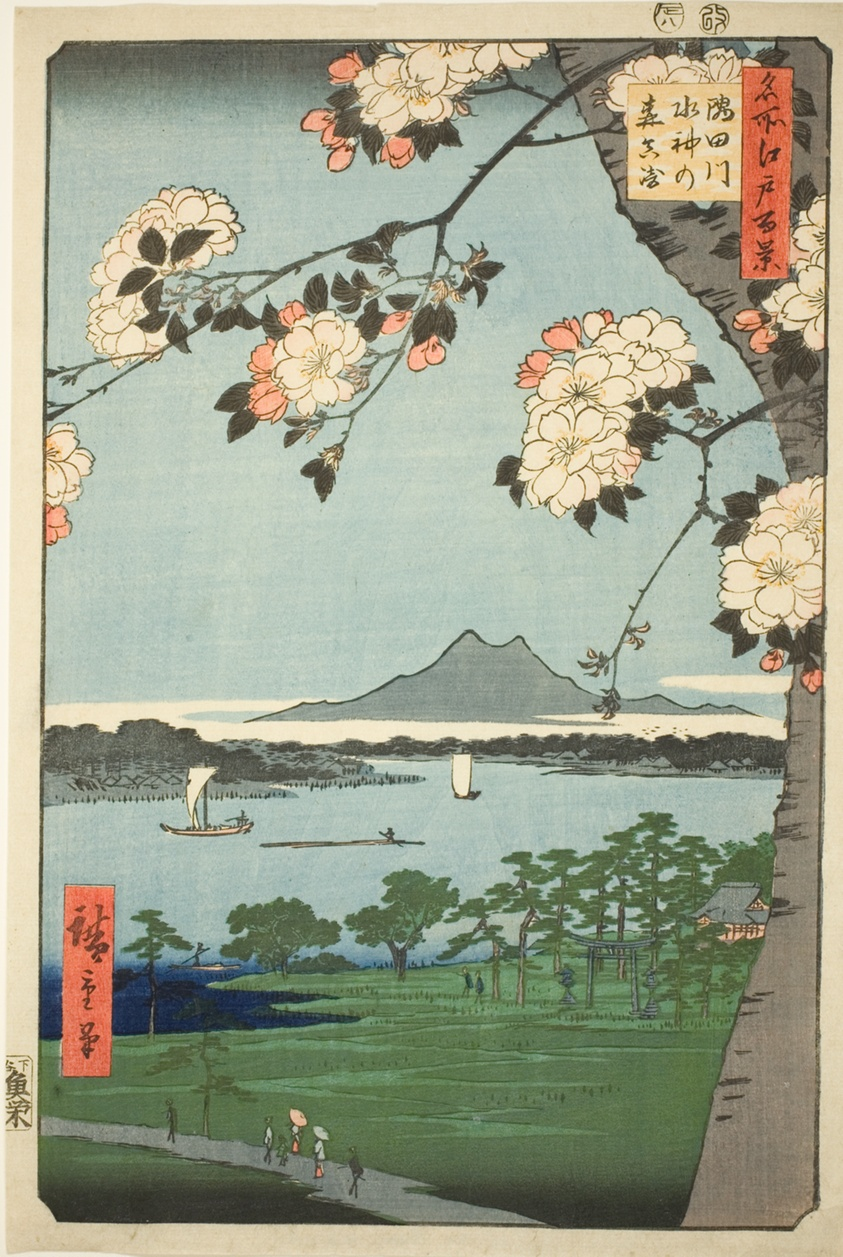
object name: Print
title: Suijin Shrine and Massaki on the Sumida River (Sumidagawa Suijin no mori Massaki), from the series "One Hundred Famous Views of Edo (Meisho Edo hyakkei)"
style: Japanese (culture or style)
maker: Utagawa Hiroshige 歌川 広重; Japanese, 1797-1858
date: 1856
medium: Color woodblock print; oban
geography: Japan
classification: woodblock print; print; asian art